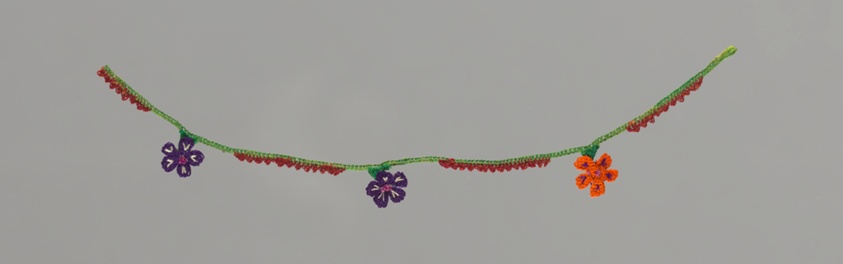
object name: Textile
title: Edging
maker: Eastern Mediterranean, probably Cyprus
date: 1875/1900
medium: Silk and horsehair, needle lace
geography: Eastern Mediterranean Region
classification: textile; lace - needle